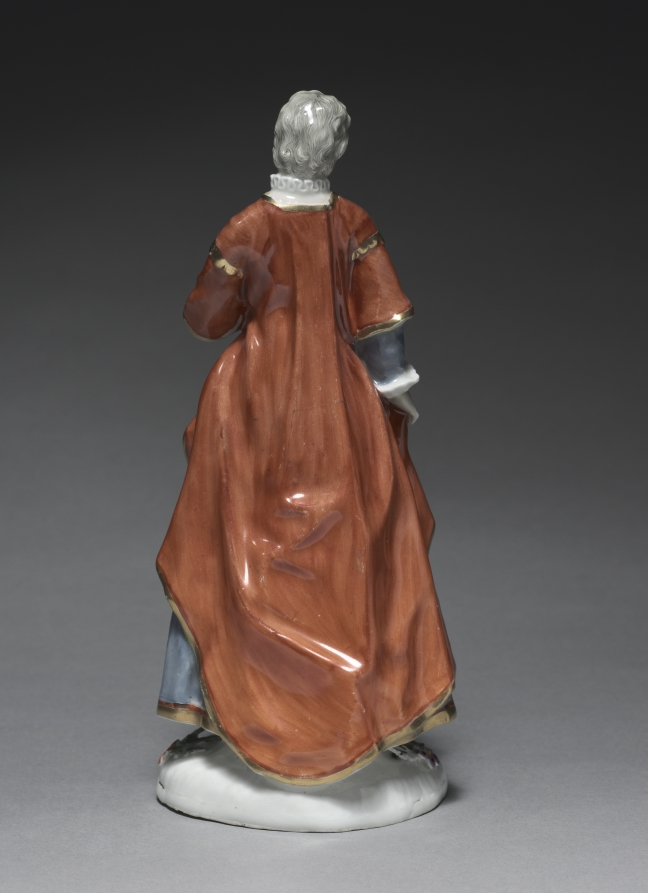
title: Italian Comedy Figure: Isabella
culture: Germany, Brunswick, 18th century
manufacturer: Fürstenberg Porcelain Factory (German)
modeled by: Simon Feilner (German, 1798)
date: c. 1753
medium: porcelain with enamel decoration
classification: Ceramic